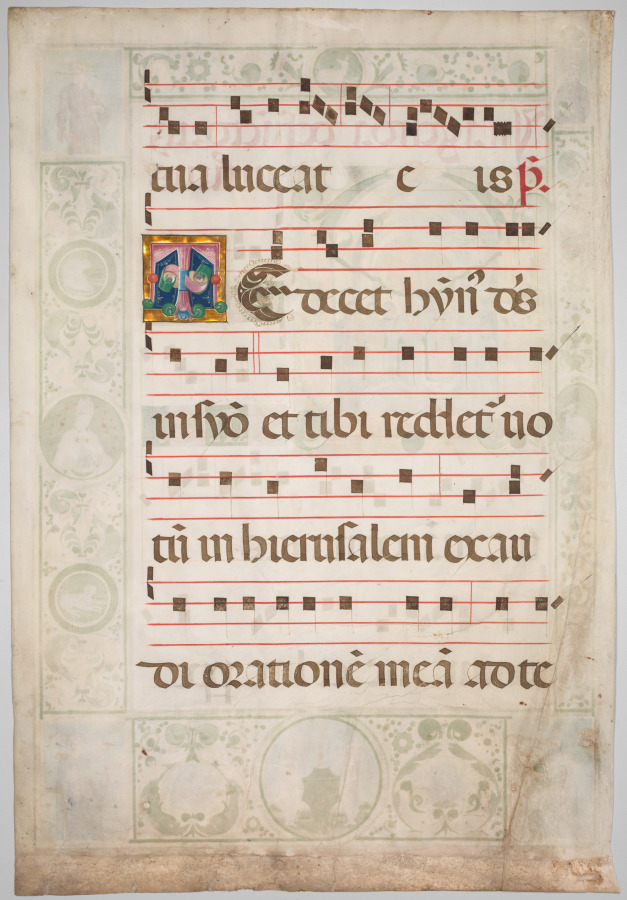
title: Leaf from a Gradual: Decorated Initial (verso)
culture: Italy, Ferrara, 15th century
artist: Jacopo Filippo d' Argenta (Italian, 1501)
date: c. 1480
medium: ink, tempera, and gold on parchment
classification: Manuscript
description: This leaf was excised from a volume of a large set of choral books known to have been commissioned by Bartolomeo delle Rovere for Ferrara Cathedral. Delle Rovere, nephew of Pope Sixtus IV, was the Bishop of Ferrara from 1474 to 1494 and his arms appear in the rondel at the bottom of the page-a shield bearing an oak tree (rovere in Italian) surmounted by a patriarchal cross, the symbol of his rank and authority. Payment records indicate that Argenta worked on the choir books for Ferrara Cathedral from 1478 to 1486. The large historiated initial R dominates the extensive decoration including a realistically painted scene in which a priest (center) surrounded by acolytes stands over the body of the deceased as he reads the Office of the Dead. The ceremony takes place within a vaulted chapel that recedes in space to create the illusion of perspective. This leaf and the one to the right are from the same set of choir books.